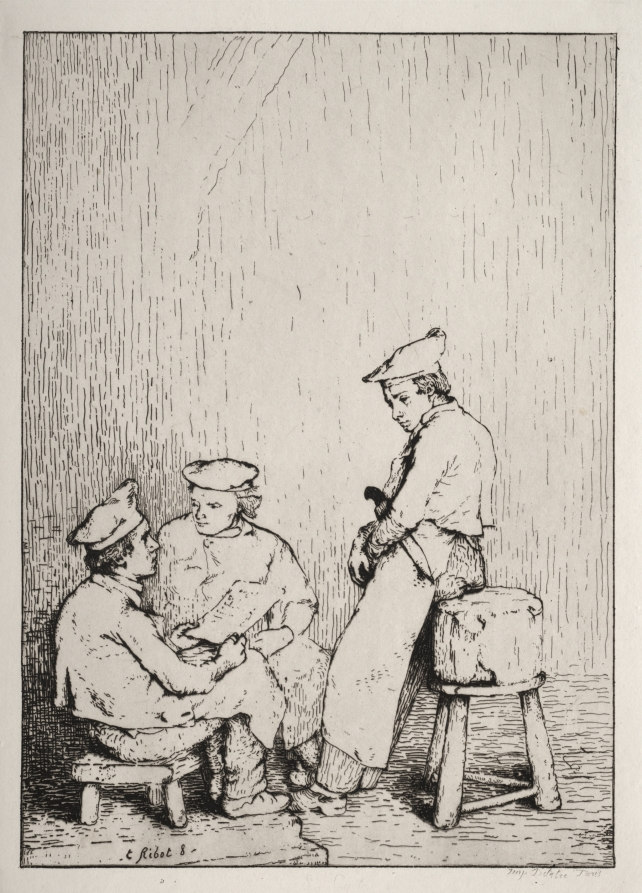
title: La Carte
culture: France, 19th century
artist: Théodule Ribot (French, 1823–1891)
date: 1860–75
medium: etching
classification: Print